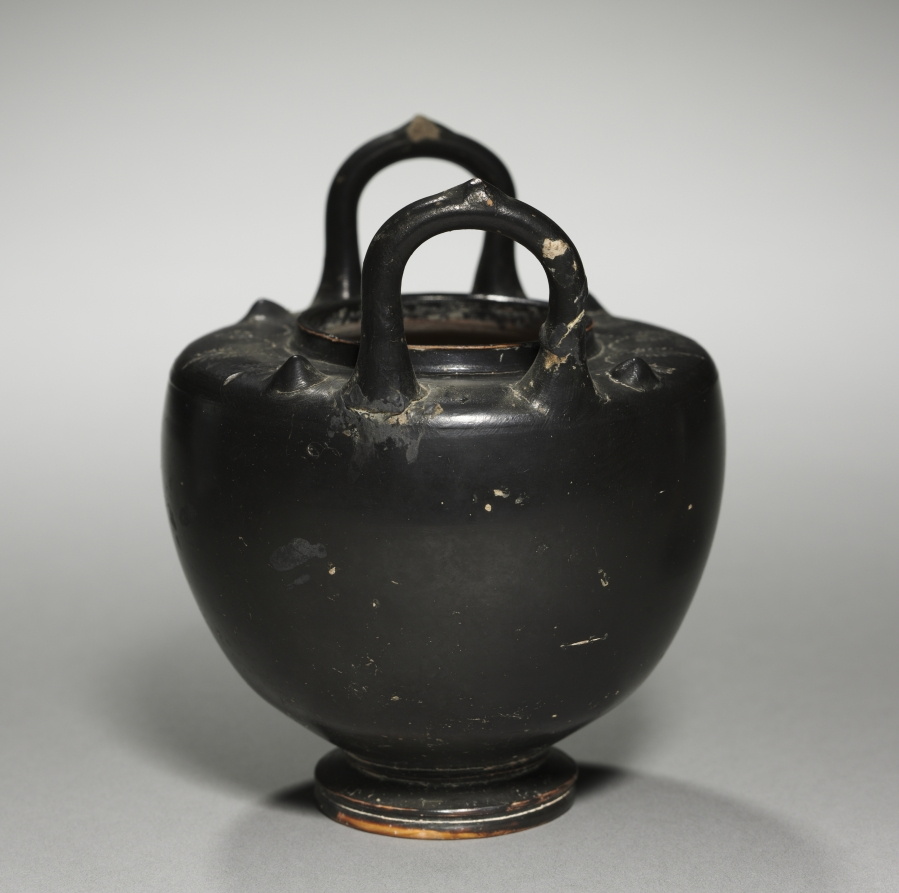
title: Black-Gloss Lebes Gamikos (Nuptial Bowl)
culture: Greek or South Italian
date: c. 425–375 BCE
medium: ceramic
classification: Ceramic